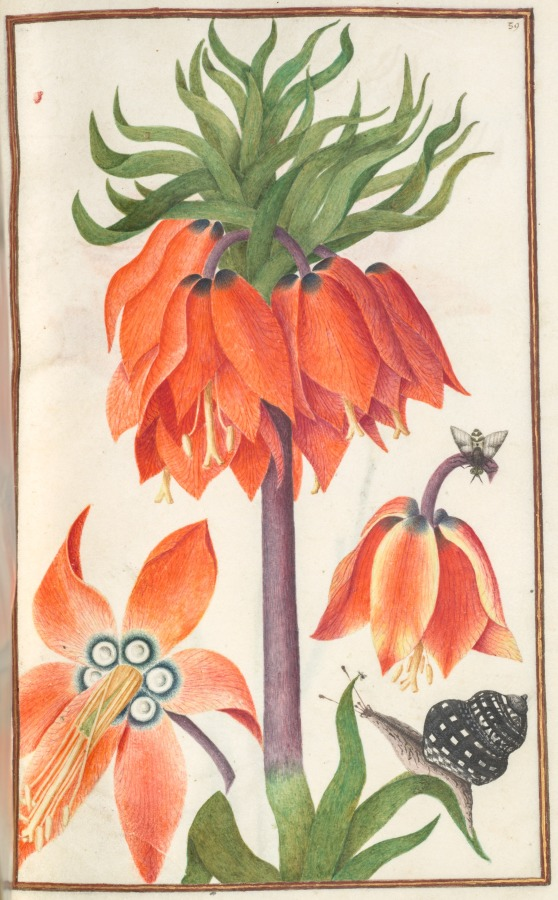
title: Orange Fritillaria Imperialis (Crown Imperial), Snail, and Bug, folio 20 (recto), from Florilegium (A Book of Flower Studies)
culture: France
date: 1608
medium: watercolor, ink, silver, and gold over occasional traces of pencil, on vellum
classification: Bound Volume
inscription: Dated: Poitiers 1608 (on frontispiece) Signed: On frontispiece in black ink, lower right: Van Kuyk Notation on drawing: Frontispiece: in pencil, lower margin: * élève de Van Kessel, peintre flammand (* in pencil also appears in front of Van Kuyk's name).